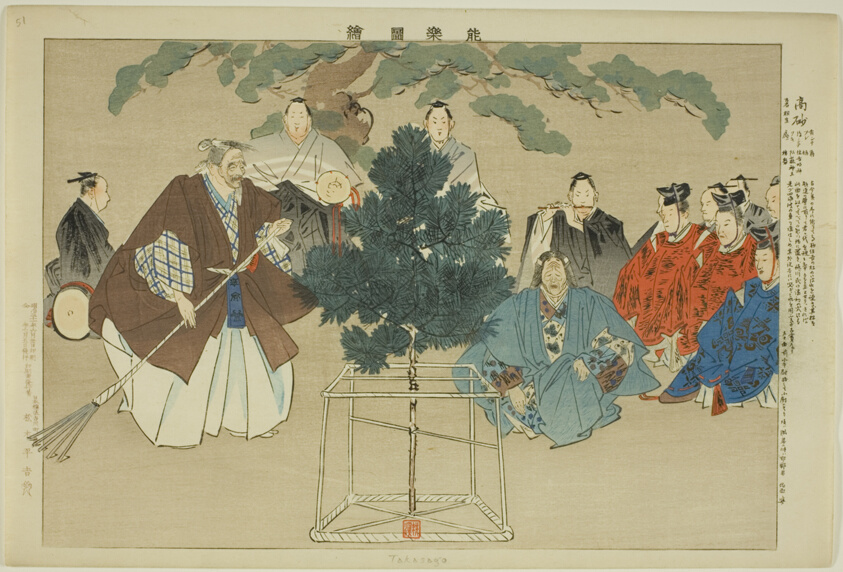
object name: Print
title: Takasago, from the series "Pictures of No Performances (Nogaku Zue)"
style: Japanese (culture or style)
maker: Tsukioka Kogyo; Japanese, 1869-1927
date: 1898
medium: Color woodblock print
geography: Japan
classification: woodblock print; print; asian art